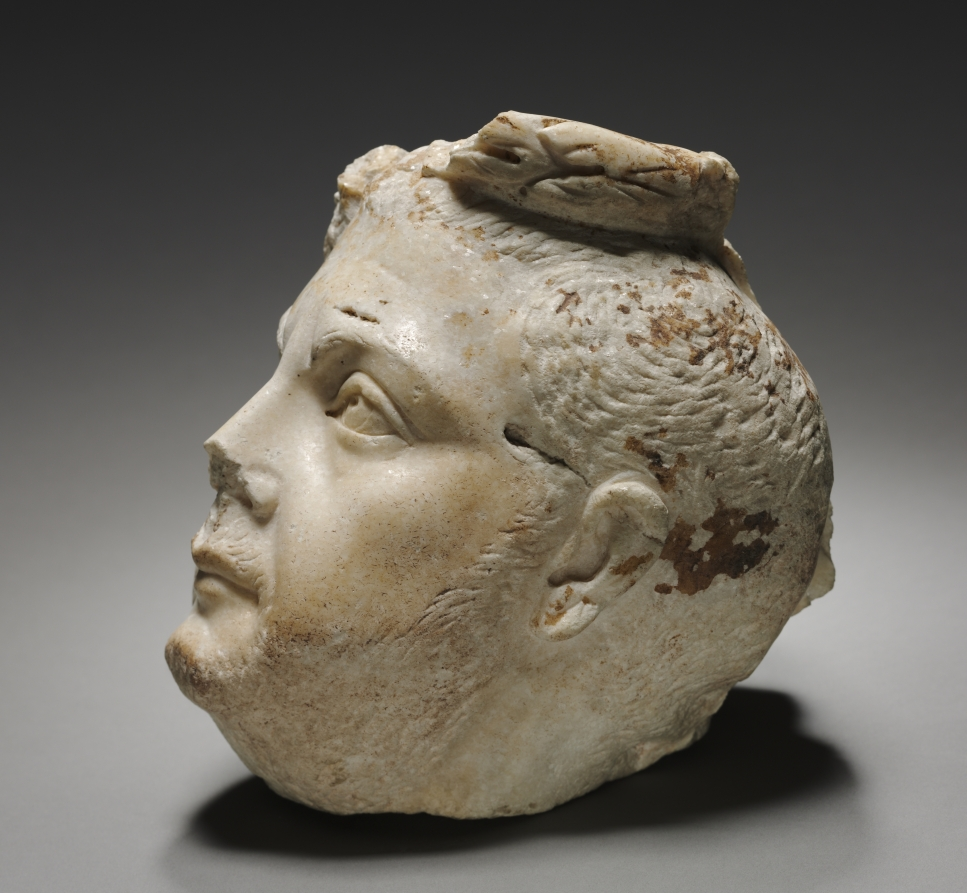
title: Relief Portrait Head of the Emperor Balbinus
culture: Italy, Roman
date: c. 238 CE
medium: marble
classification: Sculpture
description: Wearing a laurel wreath, this head belongs to the little-known Emperor Balbinus, who ruled the empire together with Pupienus for only 99 days in AD 238, the now infamous Year of the Six Emperors. Following his death at the hands of an angry mob, Balbinus and his wife (whose name remains unknown) nevertheless received a large and impressive marble sarcophagus. The couple recline together on the lid, and appear twice in relief on the front, where this head originally belonged. Remarkably, although the head was purchased in Rome in 1925, two years before the sarcophagus was discovered (in many pieces near the Praetextatus Catacombs in Rome), it was found to fit a gap in the larger sculpture in 1966. Since then, a plaster cast of the Cleveland head has remained in place on the original sarcophagus, now in the Vatican Museums.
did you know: Carved in deep relief (not quite in the round), this head comes from a large sarcophagus.